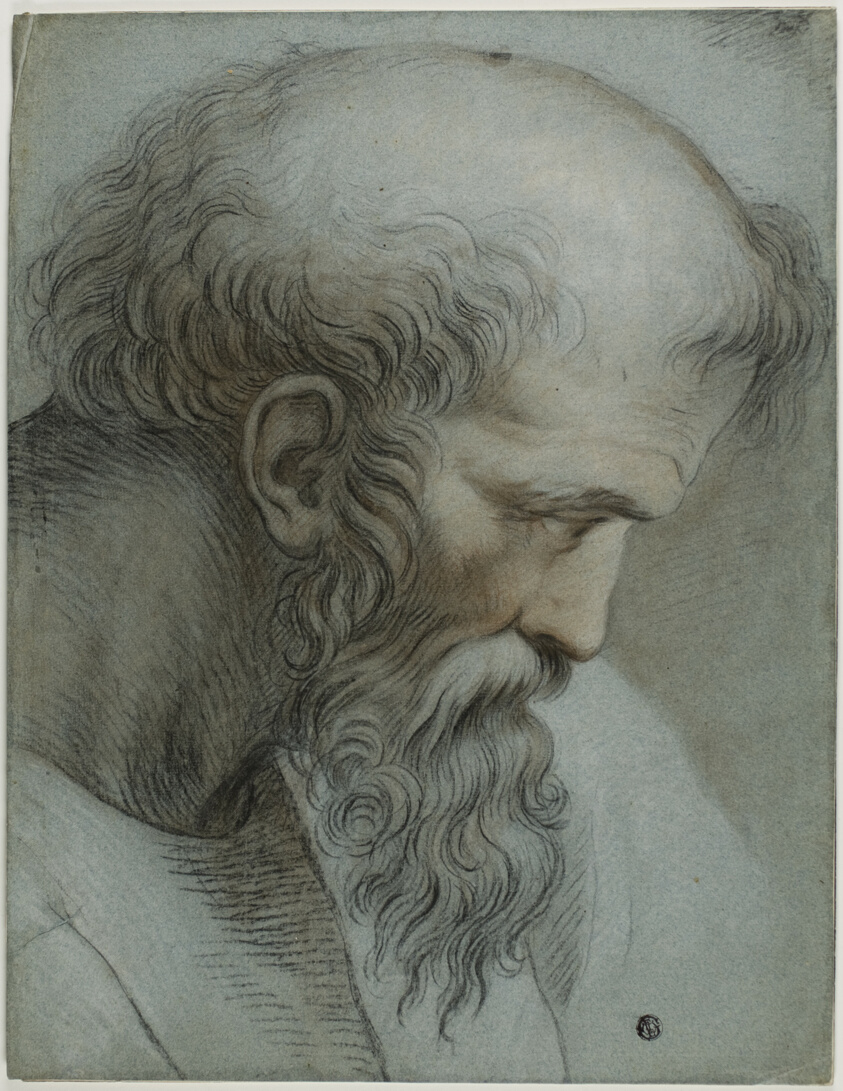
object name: Drawing and Watercolor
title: Head of Pythagoras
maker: After Raffaello Sanzio, called Raphael; Italian, 1483-1520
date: 18th century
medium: Black and red chalk with stumping, heightened with white chalk, on blue laid paper, laid down on cream laid paper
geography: Italy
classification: chalk; drawings (visual works); prints and drawing